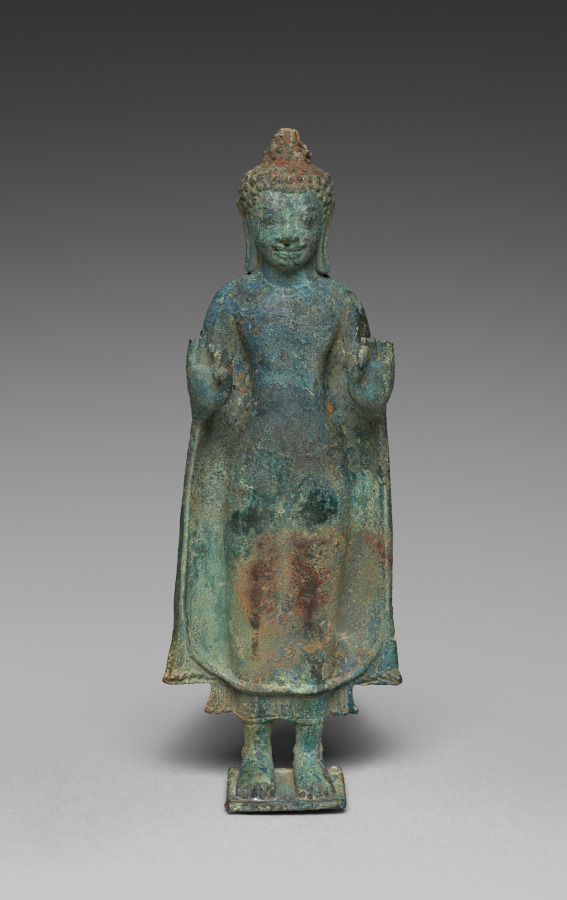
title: Buddha with Hands in Gesture of Teaching, Vitarka Mudra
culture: Thailand, Mon-Dvaravati period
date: 600s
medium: bronze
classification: Sculpture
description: Made during the early phase of Buddhist art production in mainland Southeast Asia, this Buddha wears a plain robe that indicates the artist's awareness of images made at the workshops of Sarnath, on the Ganges River in India. The hem of the lower garment, worn under the monk's robe, elegantly crosses the ankles, and the subtle line at the waist shows where it is secured.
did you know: Bronze sculptures in Thailand were made by sculpting clay around an iron armature; the clay core remains inside.